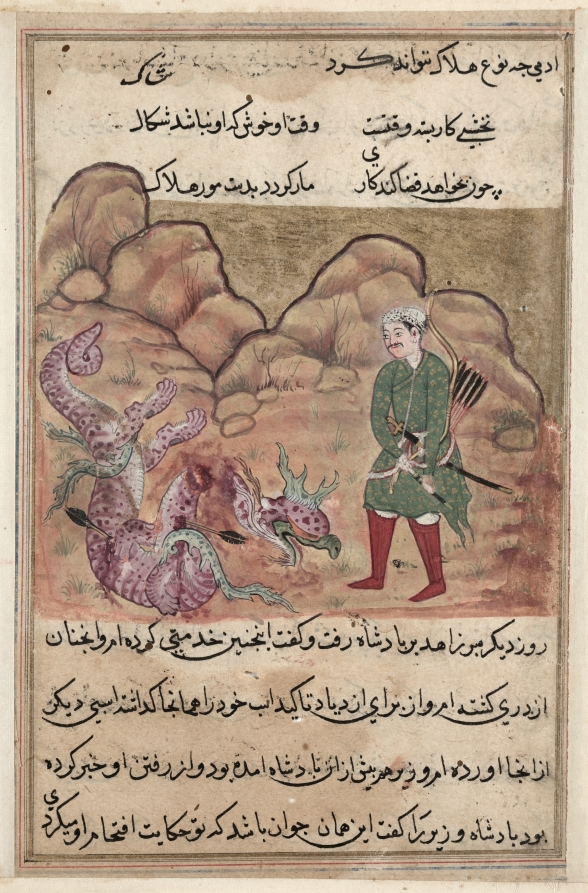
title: The son of the pious man slays the dragon, from a Tuti-nama (Tales of a Parrot): Fifty-second Night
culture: Mughal India, court of Akbar (reigned 1556–1605)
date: c. 1560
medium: gum tempera, ink, and gold on paper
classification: Painting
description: The mangled body of the dragon lies at the young man’s feet. Two poisoned arrows protrude from its side. The man has killed the dragon in hopes of marrying the king’s daughter. Although many warriors and brave men have failed at this task, the young man succeeds with ease.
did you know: The white holes in this page are from insect damage.